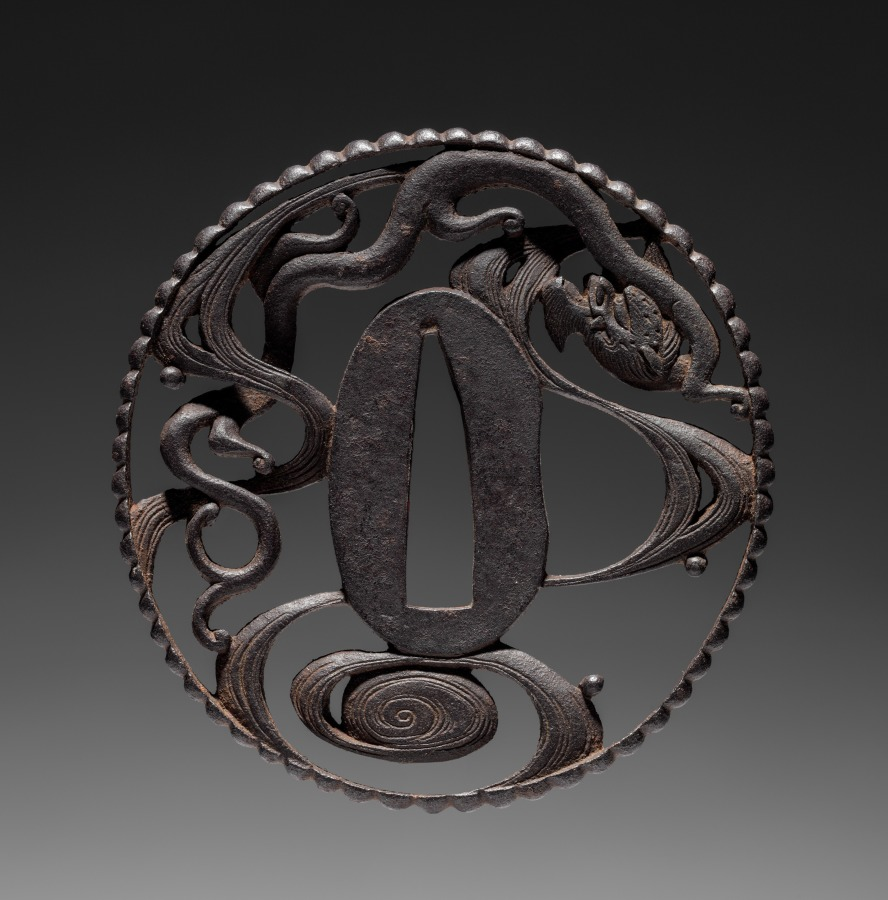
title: Sword Guard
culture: Japan, Edo period (1615–1868)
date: early 1800s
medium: iron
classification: Arms and Armor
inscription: signed "Issan, residing at Nagasaki."